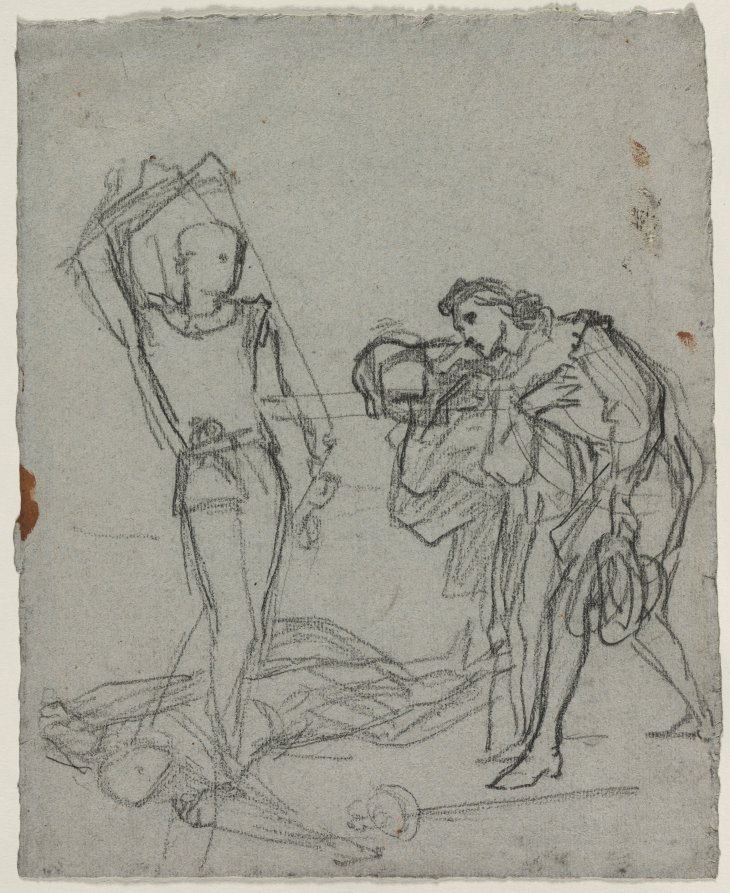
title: Duel after the Masked Ball (recto)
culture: France, 19th century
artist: Thomas Couture (French, 1815–1879)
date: c. 1857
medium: black chalk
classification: Drawing